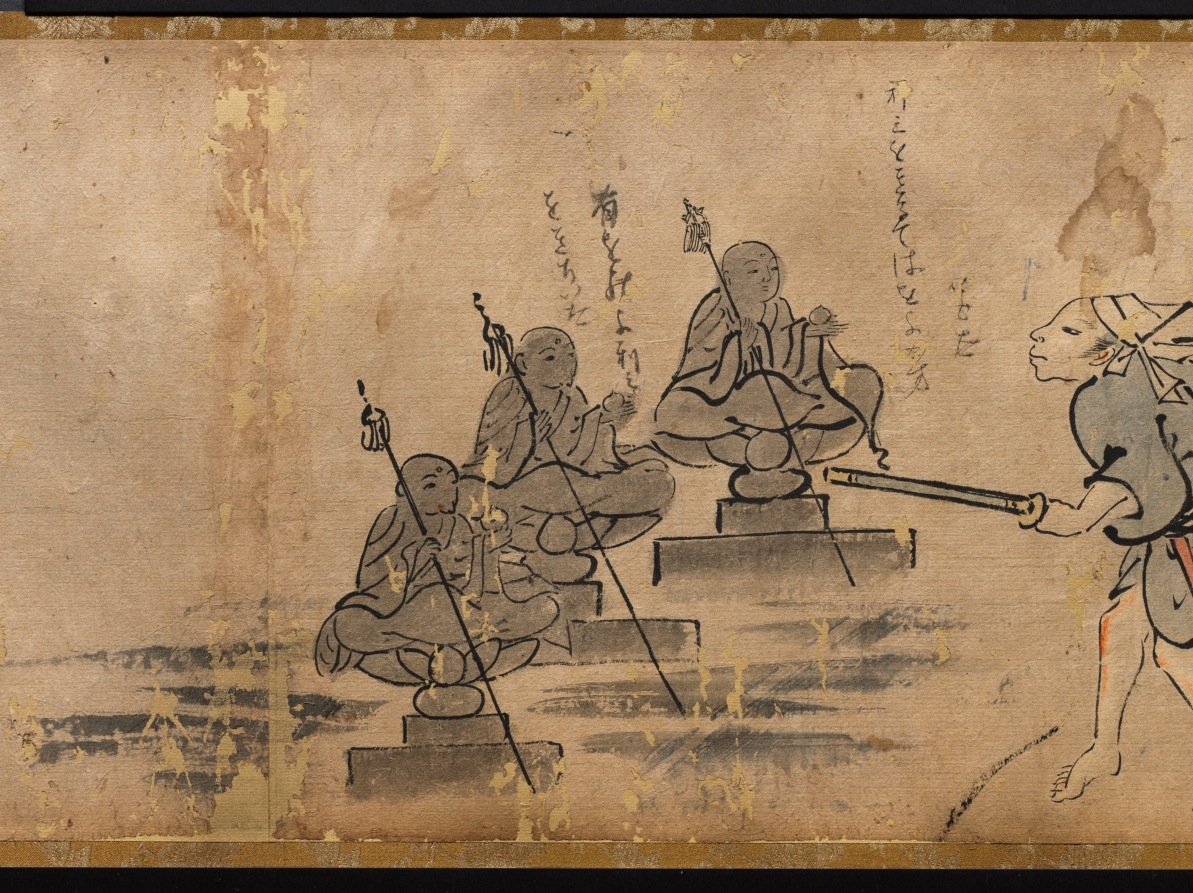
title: The Illustrated Tale of Oishi Hyōroku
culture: Japan, Edo period (1615–1868)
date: 1700s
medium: handscroll; ink and color on paper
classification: Painting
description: This incomplete handscroll illustrates part of the story of Oishi Hyoroku, a young man tasked with battling fox apparitions who were creating problems in his town. In other extant versions of the scroll, the story is set in the fall of 1624 in Kagoshima in southern Japan. Throughout the story, Hyoroku is tricked and terrified by the foxes that shift their shapes into a variety of monstrous phantoms. After repeated humiliations, he eventually captures two of the foxes. In this version, colloquial texts that function like text blurbs in comics appear throughout the scroll, but the main text is missing.